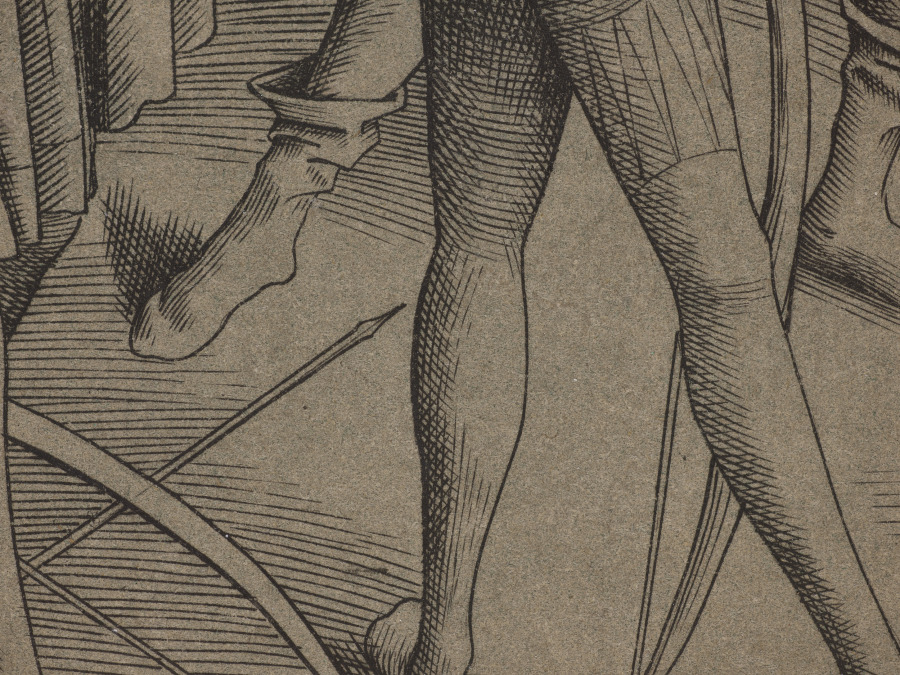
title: The King's Sons Shooting at their Dead Father's Body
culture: Germany, late 15th century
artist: Mair von Landshut (German, active about 1484–1520)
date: 1495–1504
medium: engraving on olive-gray tinted paper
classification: Print